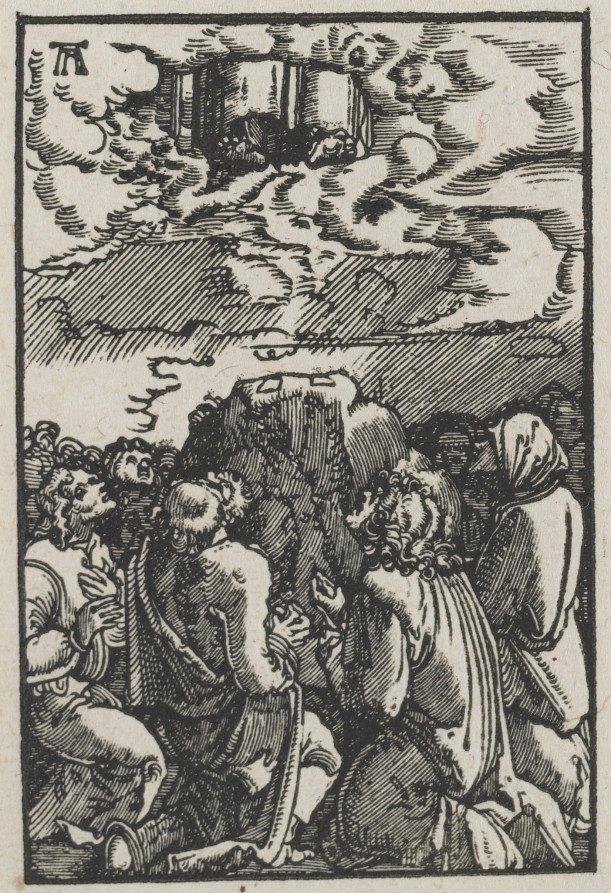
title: The Fall and Redemption of Man: The Ascension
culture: Germany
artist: Albrecht Altdorfer (German, c. 1480–1538)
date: c. 1515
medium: woodcut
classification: Print